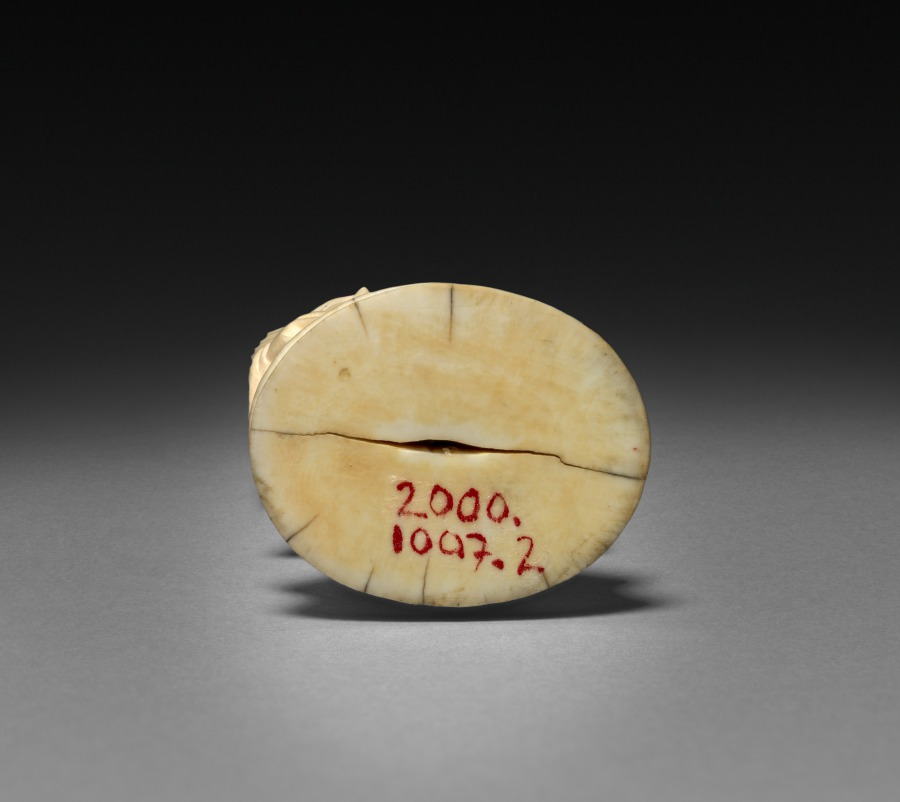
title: Chess Piece: Queen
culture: Japan, Meiji period (1868–1912)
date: early 1900s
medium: ivory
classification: Ivory